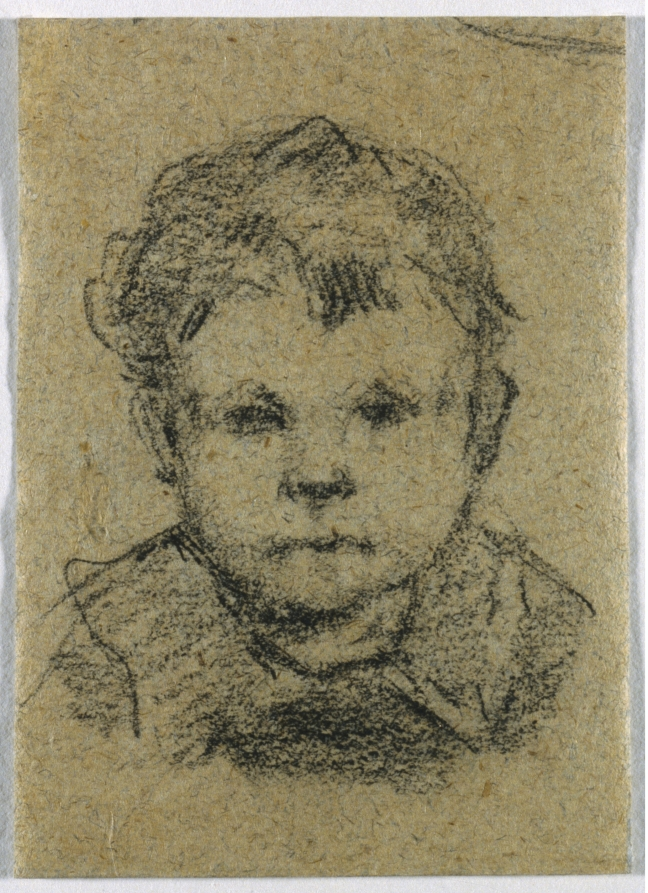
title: Emil Gauguin as a Child, Wearing a Collared Shirt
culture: France, 19th century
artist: Paul Gauguin (French, 1848–1903)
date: c. 1875–1876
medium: black crayon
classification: Drawing